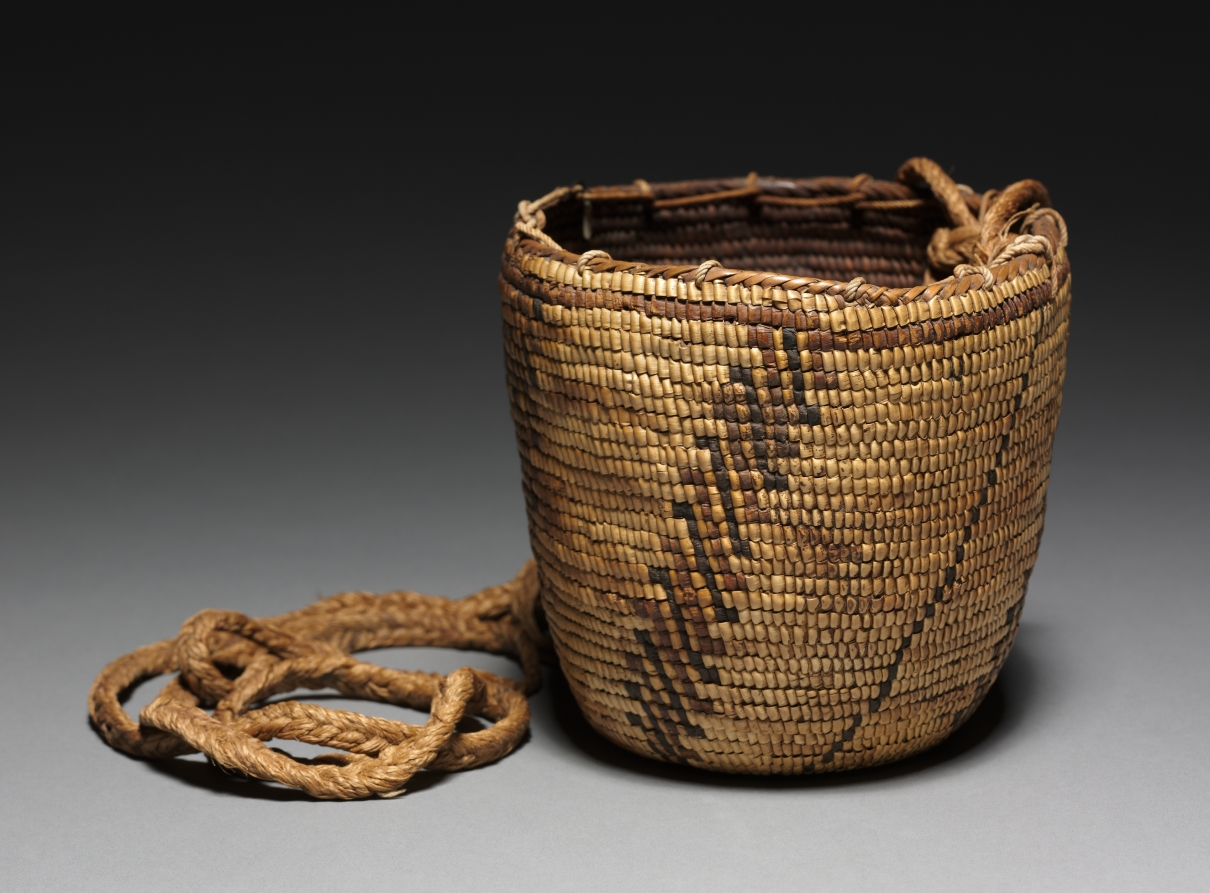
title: Berry Basket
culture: Northwest Coast, coastal, Salish, late 19th century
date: 1890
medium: woven, imbricated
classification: Basketry